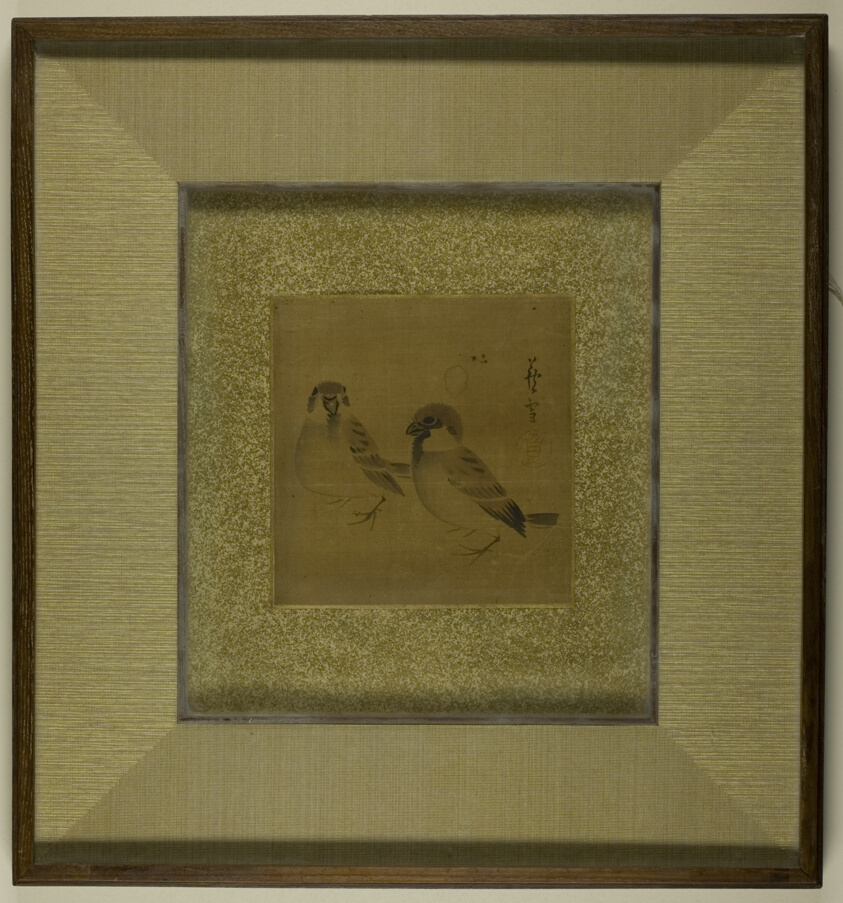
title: Two sparrows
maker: Nagasawa Rosetsu (Japanese, 1754-1799)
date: 18th century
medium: mounted painting; ink on paper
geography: Japan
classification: painting; asian art